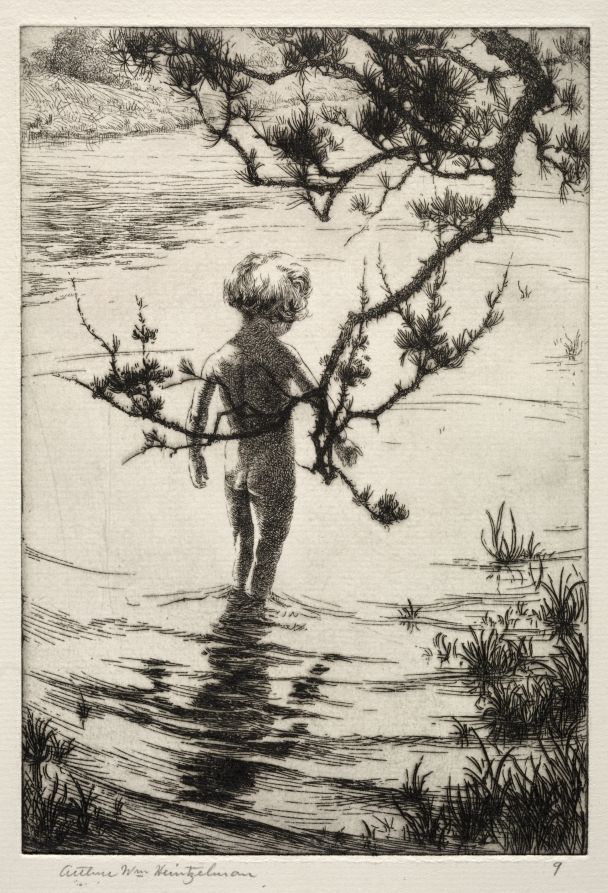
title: Sultry Afternoon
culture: America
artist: Arthur William Heintzelman (American, 1891–1965)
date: 1919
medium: etching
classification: Print